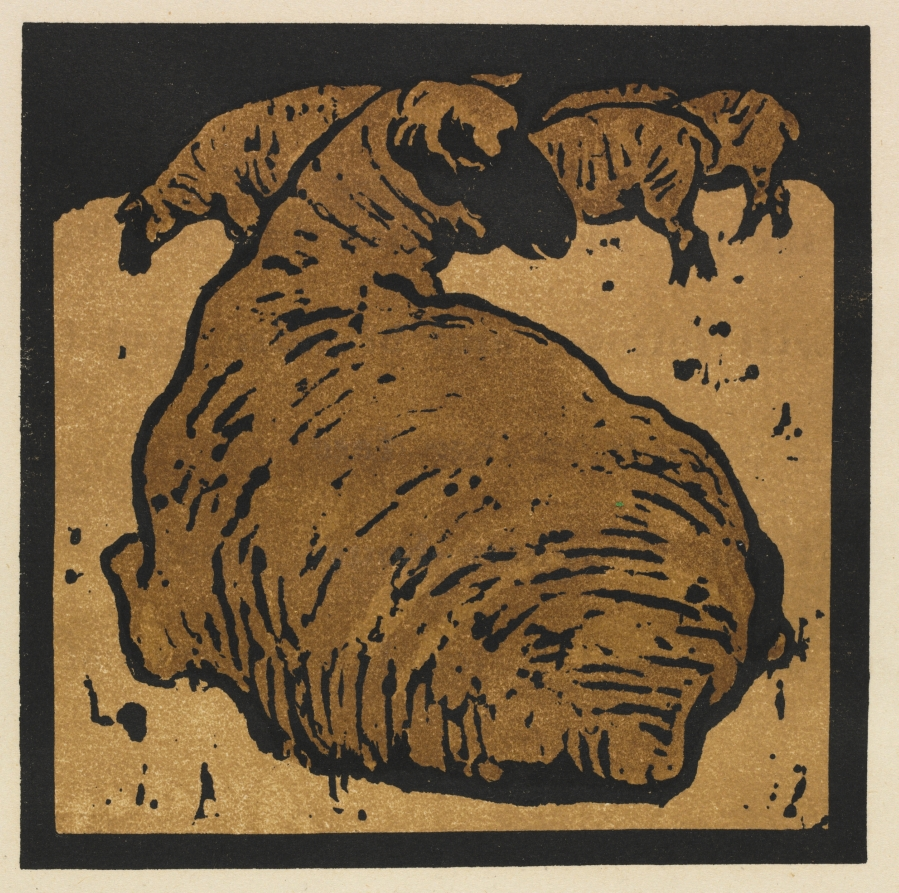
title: The Square Book of Animals: The Simple Sheep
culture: England, 19th century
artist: William Nicholson (British, 1872–1949)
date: 1899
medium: color lithograph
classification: Print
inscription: Lower right margin, in pencil: "1896 according to Campbell, woodcuts made in 1896, published as lithographs in 1899"